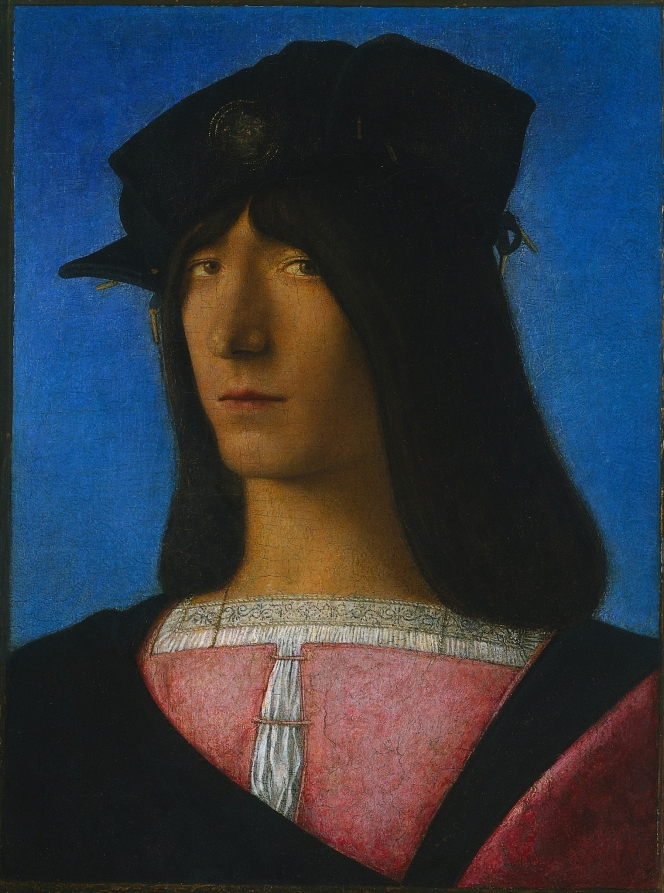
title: Portrait of a Man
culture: Italy, 16th century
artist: Bartolomeo Veneto (Italian, 1531)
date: c. 1510s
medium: oil on wood, transferred to wood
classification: Painting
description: This young man is possibly a member of the Sforza household, the ruling family of Milan during the Renaissance. He wears a plaquette on his hat indicating his nobility and status. This medallion depicts an actual work by Andrea Riccio (1470–1532), an artist whose work is represented in the museum's collection. The medallion illustrates an allegory of fortune and virtue personified by a winged woman and a child.